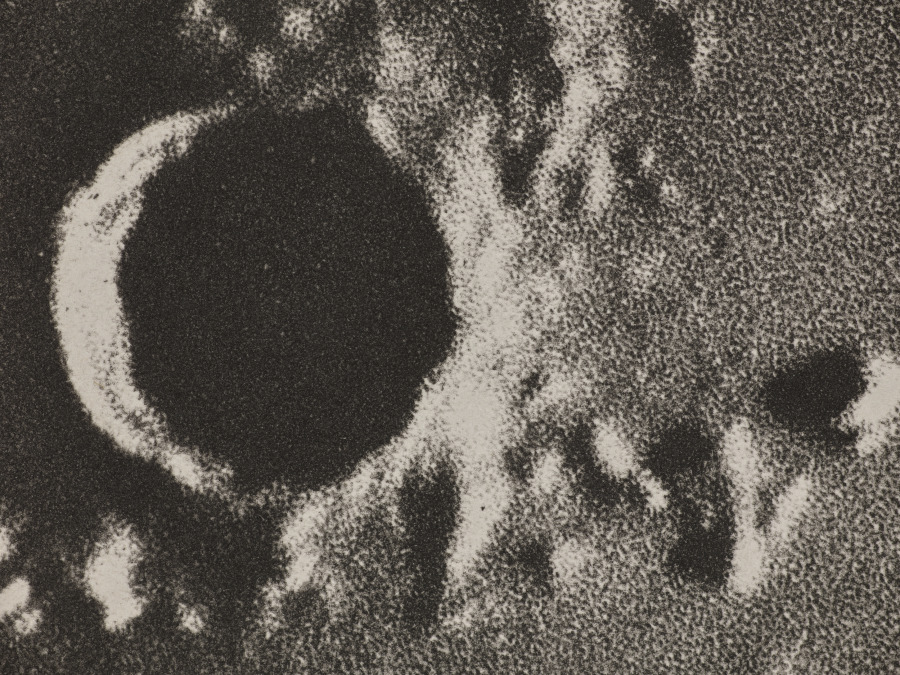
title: Photographie Lunaire: Copernic-Képler-Aristarique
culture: France, 19th century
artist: Maurice Loewy (French, 1833–1907)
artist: Pierre Henri Puiseaux (French, 1855–1928)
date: 1896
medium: photogravure (heliogravure)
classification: Photograph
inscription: Imprinted in black type on recto of photo paper: "Grand Equatorial Coude" Imprinted in black type on recto of photo paper: "1896. 29 Septembre 16 h O.tin.Paris Agrandissement 8.75 Diametre Lunaire 1 m 43" Imprinted in black type along each edge: "1-9" Imprinted in black type on gallery label on verso: "Fraenkel Gallery/49 GEARY STREET SAN FRANCISCO 94108/FURTHERMORE/[30TH Anniversary Exhibition]/Fraenkel Gallery/April 22-June 26, 2010" Imprinted in black type on gallery label on verso: "Fraenkel Gallery/49 GEARY STREET SAN FRANCISCO 94108/LOEWY & PUISEUX/Photographie Lunaire: Copernie-Kepler-/Aristarique, Septembre 29, 1896 heliogravure/22-1/2 x 18-3/4 inches (image)/29-1/2 x 22 inches (sheet)/Plate XVI/[LP.0302.Z]"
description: This plate is from a deluxe 12-volume atlas of the moon created by astronomers Maurice Loewy and Pierre Henri Puiseaux. The atlas remained the most accurate reference of the moon’s surface until the age of space travel. The duo captured thousands of images at the Paris Observatory through a telescope that Loewy invented. It was equipped with a mechanism that tracked the moon’s movements during the exposures. Given weather conditions, they were only able to photograph 50 to 60 nights per year; the project thus took 15 years to complete and contained nearly 100 large-scale photogravures.